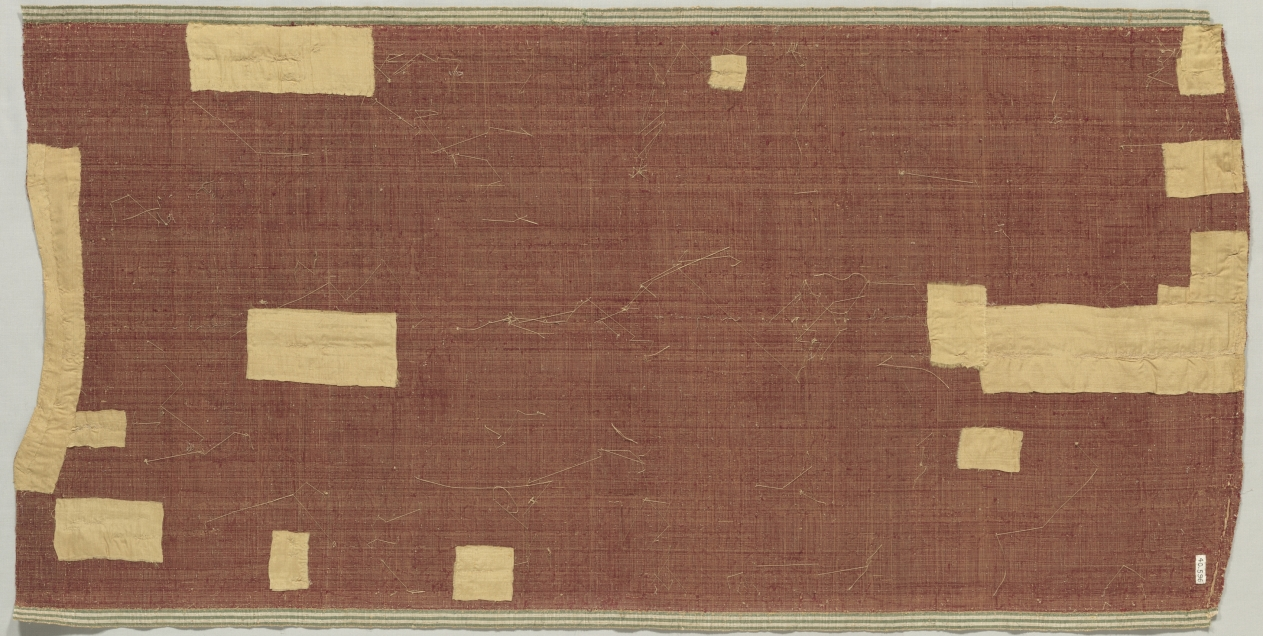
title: Silk Velvet with Gold in Pomegranate Pattern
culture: Italy, possibly Florence, 15th century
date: 1450–1500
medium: silk, gold thread; velvet: cut pile in two heights, uncut pile loops, gold-thread loops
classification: Velvet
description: Luxurious silk velvets with expensive gold thread were symbols of wealth and power. The finest velvets during the 1400s have two, or even three, heights of lush projecting pile. This fashionably large pomegranate pattern features exorbitant gold-thread loops enriching the lower level and a plain higher level. The curved upper and lower contours suggest this was the back of a sleeveless ecclesiastical vestment known as a chasuble. The striped green and ivory selvage was the equivalent of a label, required by law. It identified the fiber content, its quality, and quantity, which determined the price. Selling prices reflected the costs of the raw materials—gold thread, silk, and dyestuffs. Compensation for artisans was generally minimal.